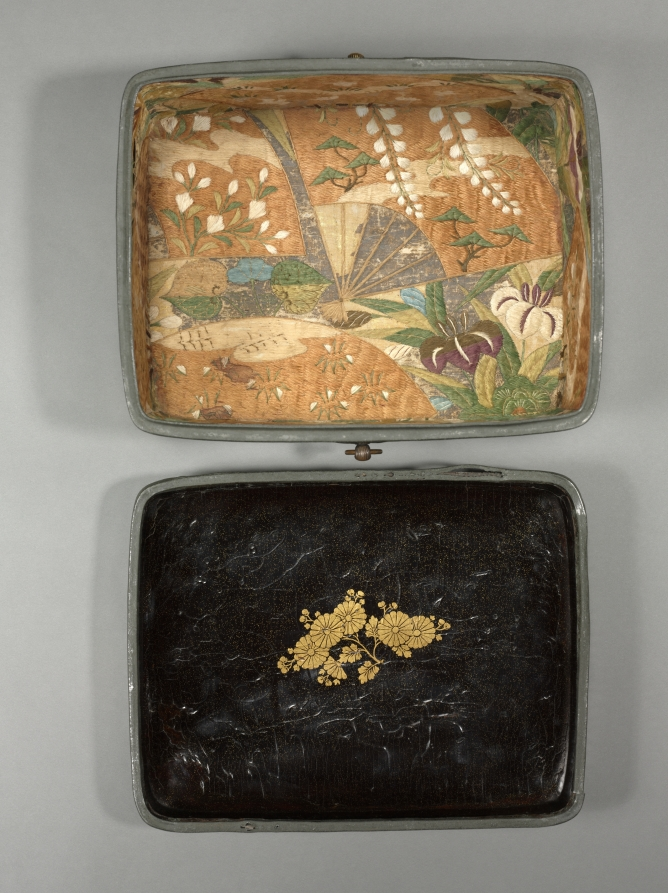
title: Cosmetics Box with Chrysanthemums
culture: Japan, Kamakura period (1185–1333)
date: early 1300s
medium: lacquer on wood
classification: Lacquer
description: In China, the chrysanthemum was historically appreciated for its association with the Double Nine Festival and the reclusive life of the poet Tao Yuanming (AD 365-427). In Japan, the 16-petaled chrysanthemum came to symbolize the Japanese imperial family after Emperor Gotoba (1180-1239) chose the motif as his personal emblem, having it applied to his sword and everyday utensils. This box proves that the flower also appeared on lacquer wares as early as the Kamakura period.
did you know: In Japanese, this type of small box is called a tebako, literally a hand box, and was typically part of a cosmetics set.